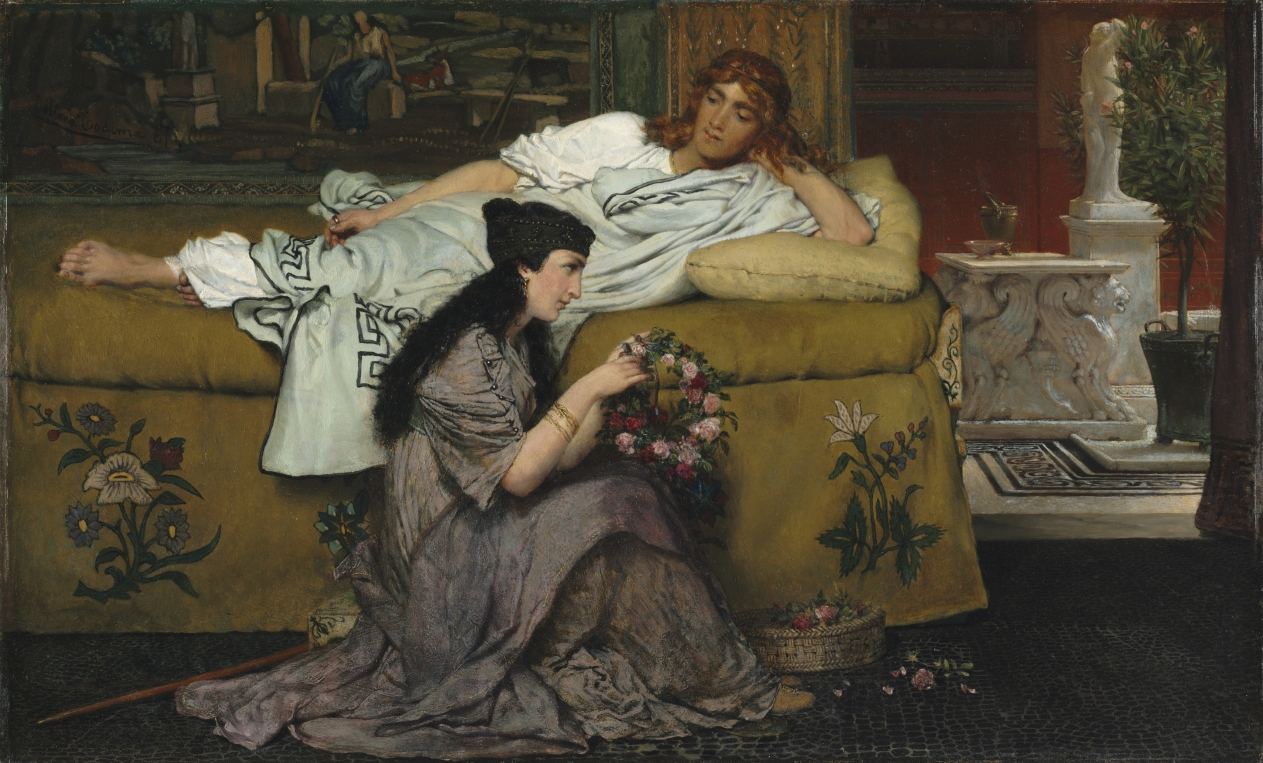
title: Glaucus and Nydia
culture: England, 19th century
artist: Lawrence Alma-Tadema (British, 1836–1912)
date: 1867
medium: oil on wood panel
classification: Painting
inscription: Signed upper left: L. Alma Tadema 67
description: "It was one of the few moments in her brief and troubled life that it was sweet to treasure." Weaving a rose garland as a present for her beloved master Glaucus, the blind servant Nydia resists speaking of her love for him. The scene is based on Sir Edward Bulwer-Lytton's enormously popular historical novel The Last Days of Pompeii (published in 1835), a melodramatic epic set in ancient Roman times, which culminates with the eruption of Mount Vesuvius. Responding to the 19th-century appetite for things antique, the artist filled his historical scenes with depictions of Roman frescoes and statuary. Dutch by birth, Alma-Tadema made this picture in Brussels for a London art dealer. But the demand for such paintings became so great that he moved to England, where he achieved great financial and social success.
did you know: Alma-Tadema, one of the most popular Victorian painters, became famous for his depictions of the luxury and decadence of the Roman Empire. His vision of the ancient world was constantly reproduced on film in Hollywood.